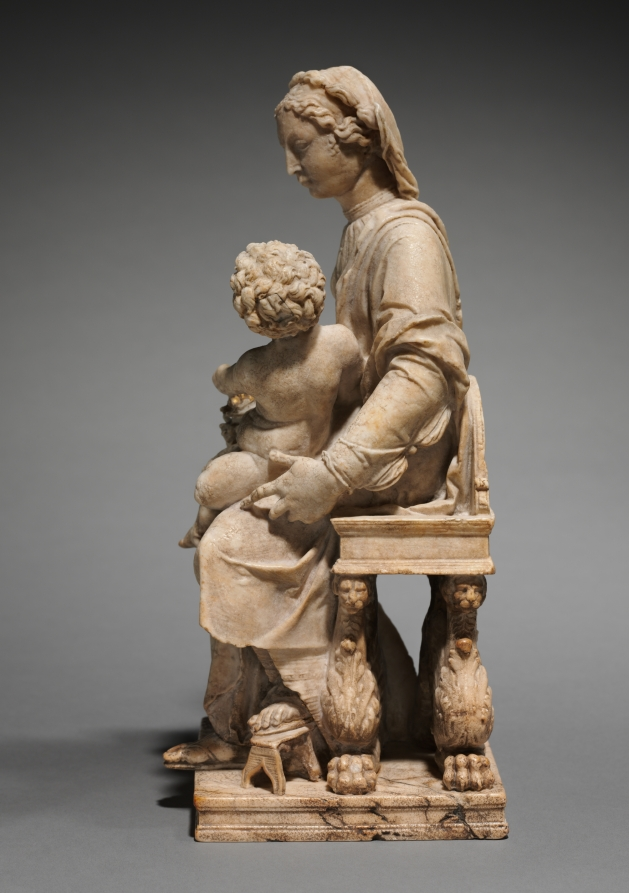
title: Charity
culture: Franco-Flemish, second half 16th century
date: c. 1550–1600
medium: alabaster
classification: Sculpture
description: When this alabaster group entered the museum's collection, it was thought to depict the Virgin Mary, Christ, and Saint John the Baptist. It has been identified, however, as a personification of Charity, the most elevated of the three Christian theological virtues. The two other theological virtues are Faith and Hope. Within Christian belief, Charity is also known as a supernatural virtue, where the object of human conduct is the ultimate unification with God through love. Alluding to its eminent position, Charity sits enthroned, with powerful hybrid beasts supporting her chair. The diminutive footstool propping up her left foot may refer to the necessity of humility in one's relationship to God. Also, a child raises a vessel filled with fruits to another suggesting that selflessness and love are attributes of charitable actions.